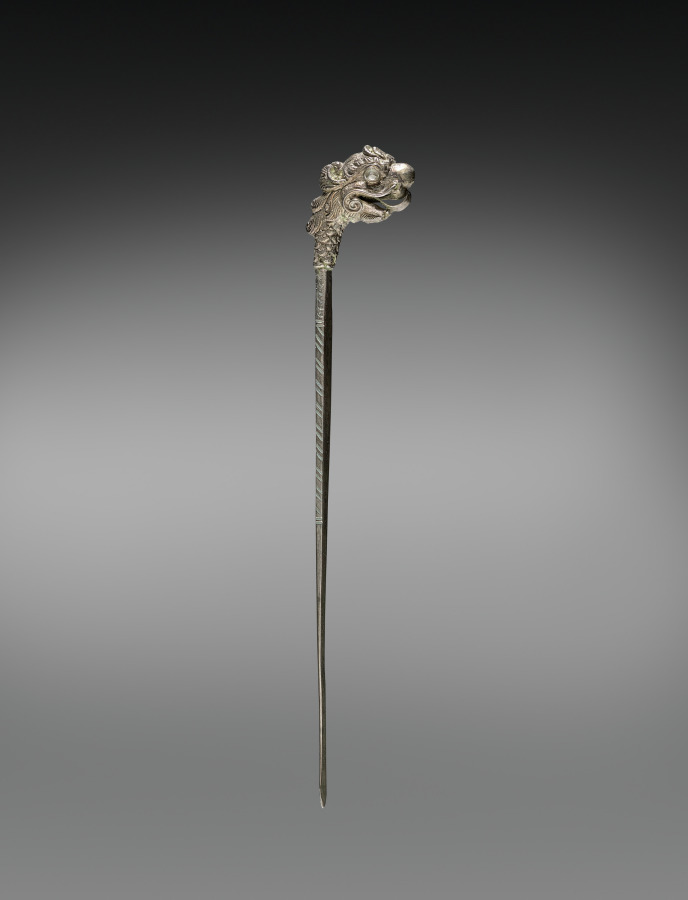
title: Hair Pin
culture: Siam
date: 1800s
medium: silver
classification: Jewelry